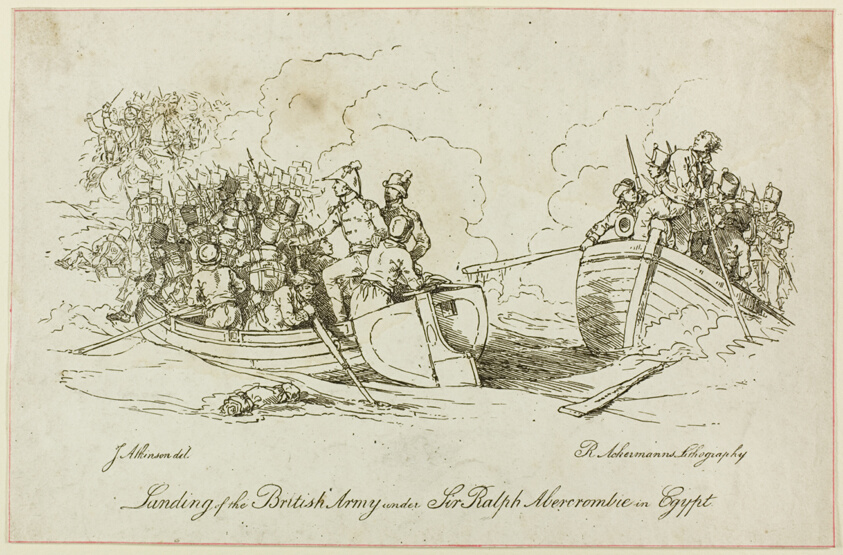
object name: Print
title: Landing of British Army under Abercrombie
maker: Unknown Artist; after John Augustus Atkinson (English 1775-1838); published by Rudolph Ackermann (English, 1764-1834)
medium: Lithograph on paper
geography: England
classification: lithograph; print; prints and drawing